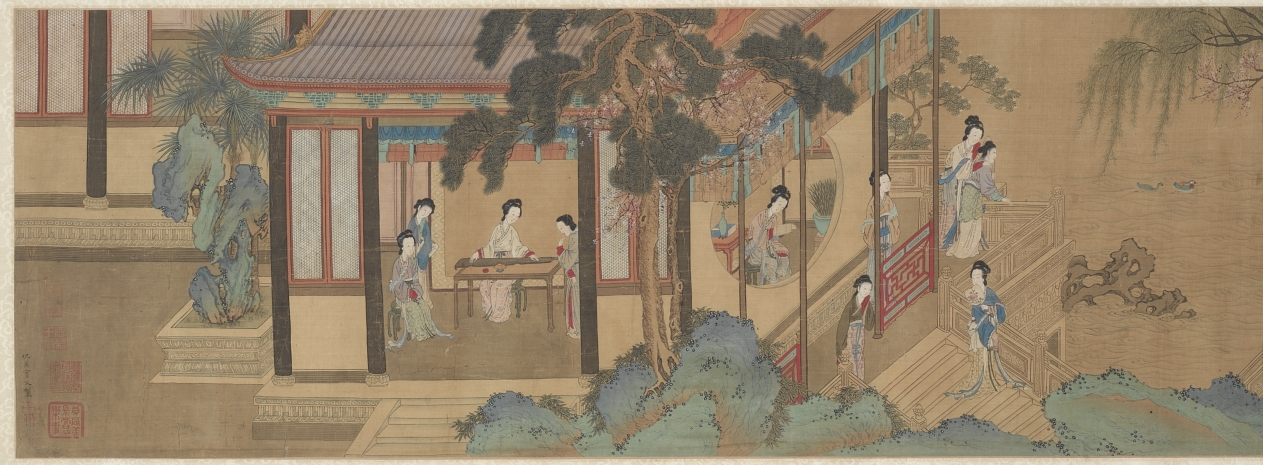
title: Palace Ladies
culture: China, Qing dynasty (1644-1911)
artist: copy after Qiu Ying (Chinese, 1494–1552)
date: 1644–1911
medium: handscroll, ink and color on silk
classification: Painting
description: This handscroll illustrates the pursuits of court ladies in a palace precinct on a spring day. Women, young girls, and their maids amuse themselves by sitting on a swing, playing games, watering and admiring peonies, performing music together, playing the qin (zither), feeding a parrot on the balustrade and fish in the water, or catching butterflies. The life of elite women was mostly restricted to the so-called inner quarters, meaning the garden and inner courts of the house. This painting idealizes the world of young palace girls that in fact was often filled with boredom and waiting for a lover.